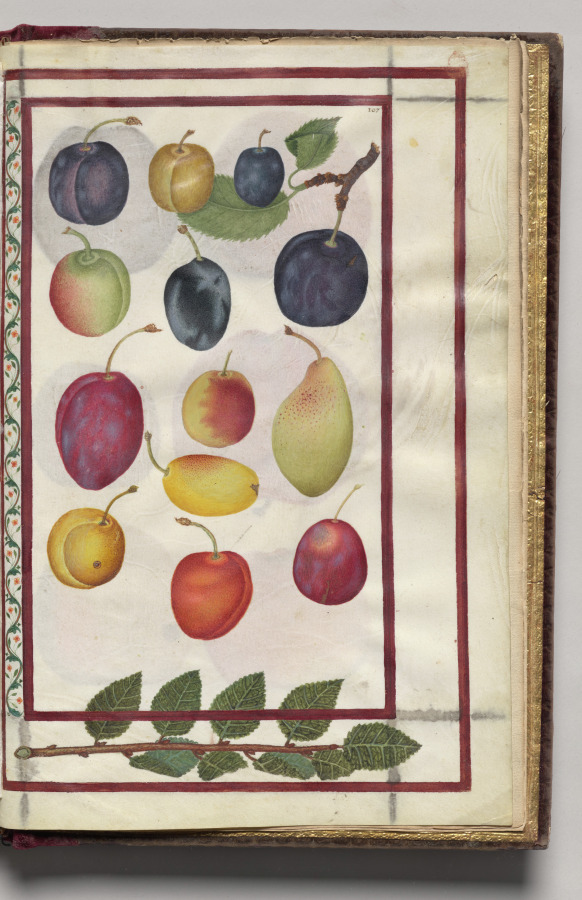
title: Plums with Branch Border, folio 48 (recto), from Florilegium (A Book of Flower Studies)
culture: France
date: 1608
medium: watercolor, ink, silver, and gold over occasional traces of pencil, on vellum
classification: Bound Volume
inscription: Dated: Poitiers 1608 (on frontispiece) Signed: On frontispiece in black ink, lower right: Van Kuyk Notation on drawing: Frontispiece: in pencil, lower margin: * élève de Van Kessel, peintre flammand (* in pencil also appears in front of Van Kuyk's name).